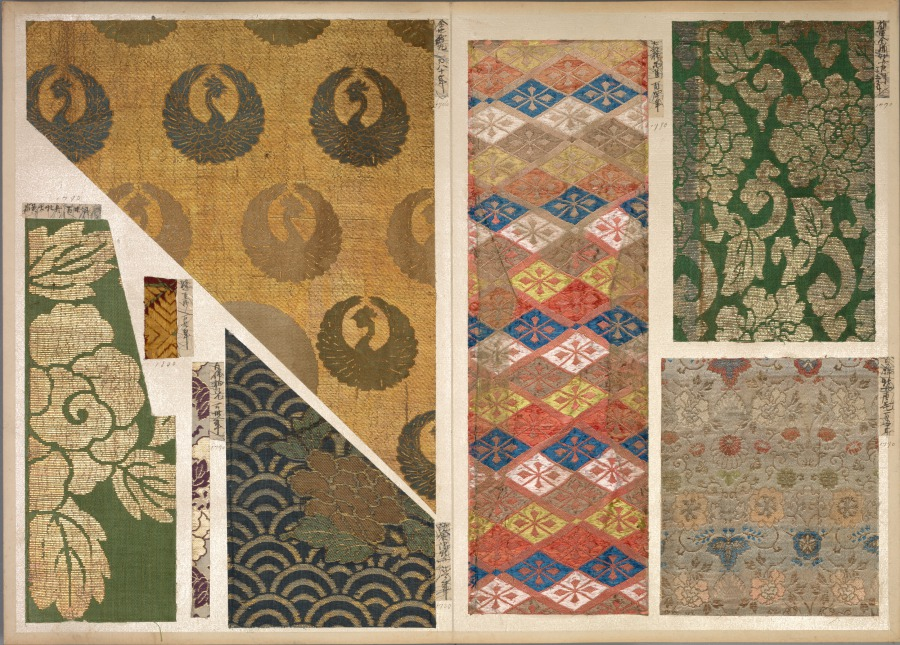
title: Album of Textile Samples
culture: Japan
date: 1790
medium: silk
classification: Textile